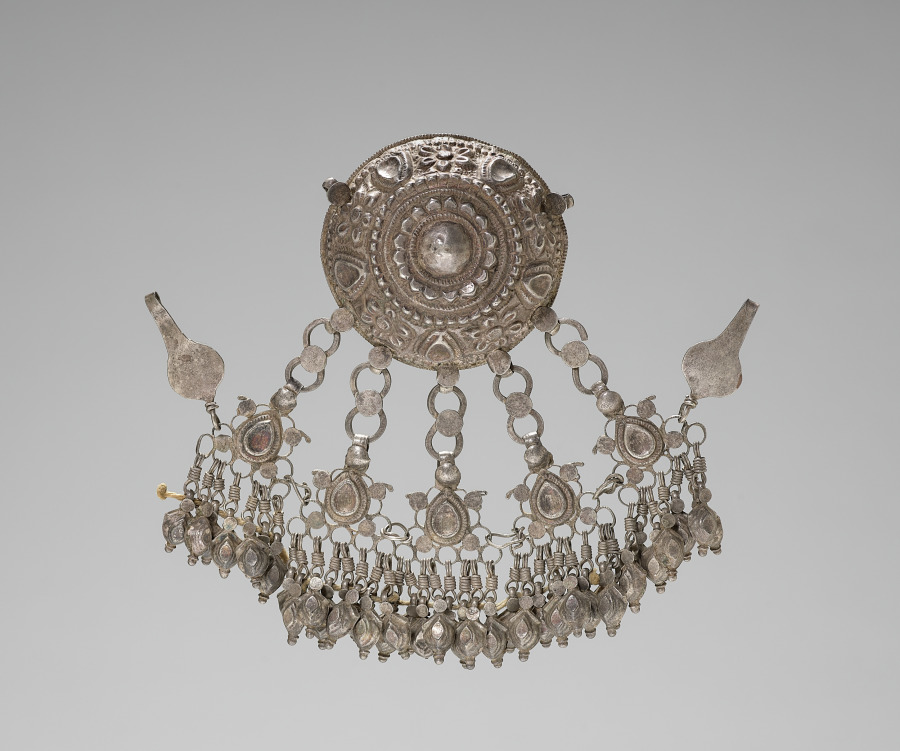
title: Breast Ornament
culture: India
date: 1800s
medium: silver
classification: Jewelry